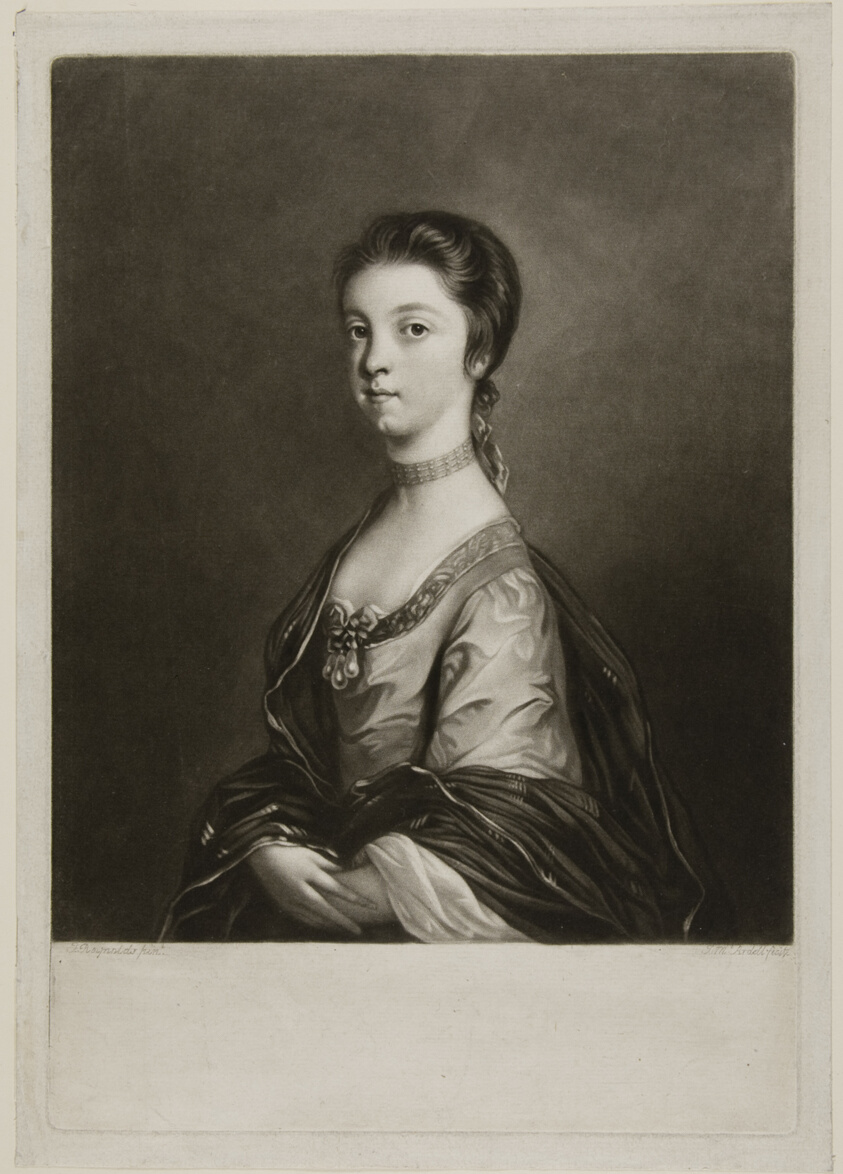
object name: Print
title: Lady Elizabeth Montagu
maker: James McArdell (Irish, c. 1728-1765); after Sir Joshua Reynolds (English, 1723-1792)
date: 1756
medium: Mezzotint on ivory laid paper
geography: Ireland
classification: mezzotint; print; prints and drawing